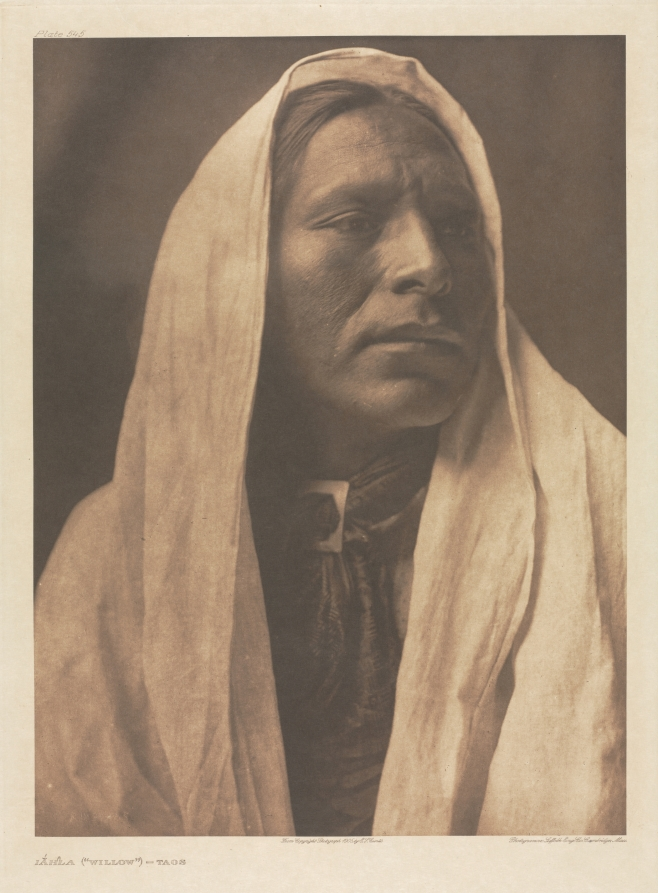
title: Portfolio XVI, Plate 545: Iahla ("Willow") - Taos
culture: America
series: The North American Indian: being a series of Portfolios picturing and describing the Indians of the United States, the Dominion of Canada, and Alaska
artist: Edward S. Curtis (American, 1868–1952)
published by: The University Press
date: 1905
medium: photogravure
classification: Portfolio